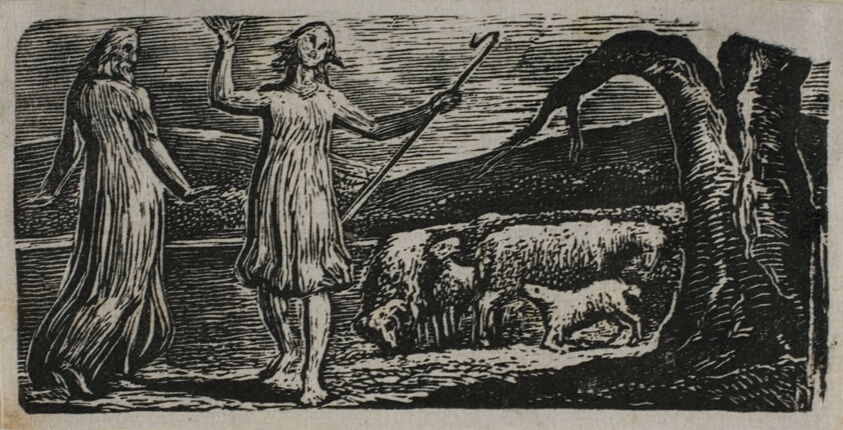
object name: Print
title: Colinet Departs in Sorrow: Riven Trunk at Right, from The Pastorals of Virgil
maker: William Blake (English, 1757-1827)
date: 1821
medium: Wood engraving on off-white wove paper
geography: England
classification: wood engraving; print; prints and drawing; paper